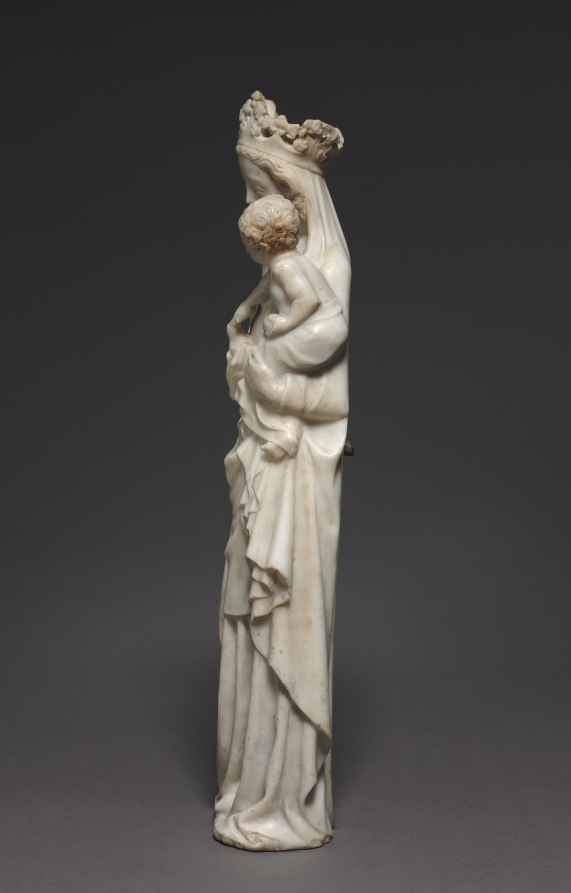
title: Virgin and Child with a Bird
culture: France, Île-de-France, Paris, 14th century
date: c. 1350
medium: marble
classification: Sculpture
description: The Virgin and Child represents one of the most frequent subjects for free-standing sculpture in 14th-century France, motivated by the developing cult of the Virgin and increasing veneration of Mary. Such sculptures were not restricted to churches, but were also found in roadside shrines, entrances to towns, and domestic use in private chapels. The small scale of this statuette suggests it was made for private veneration. The bird, held in the Virgin’s right hand, was a well-known symbol of the human soul and represents Christ’s role as redeemer of humankind.